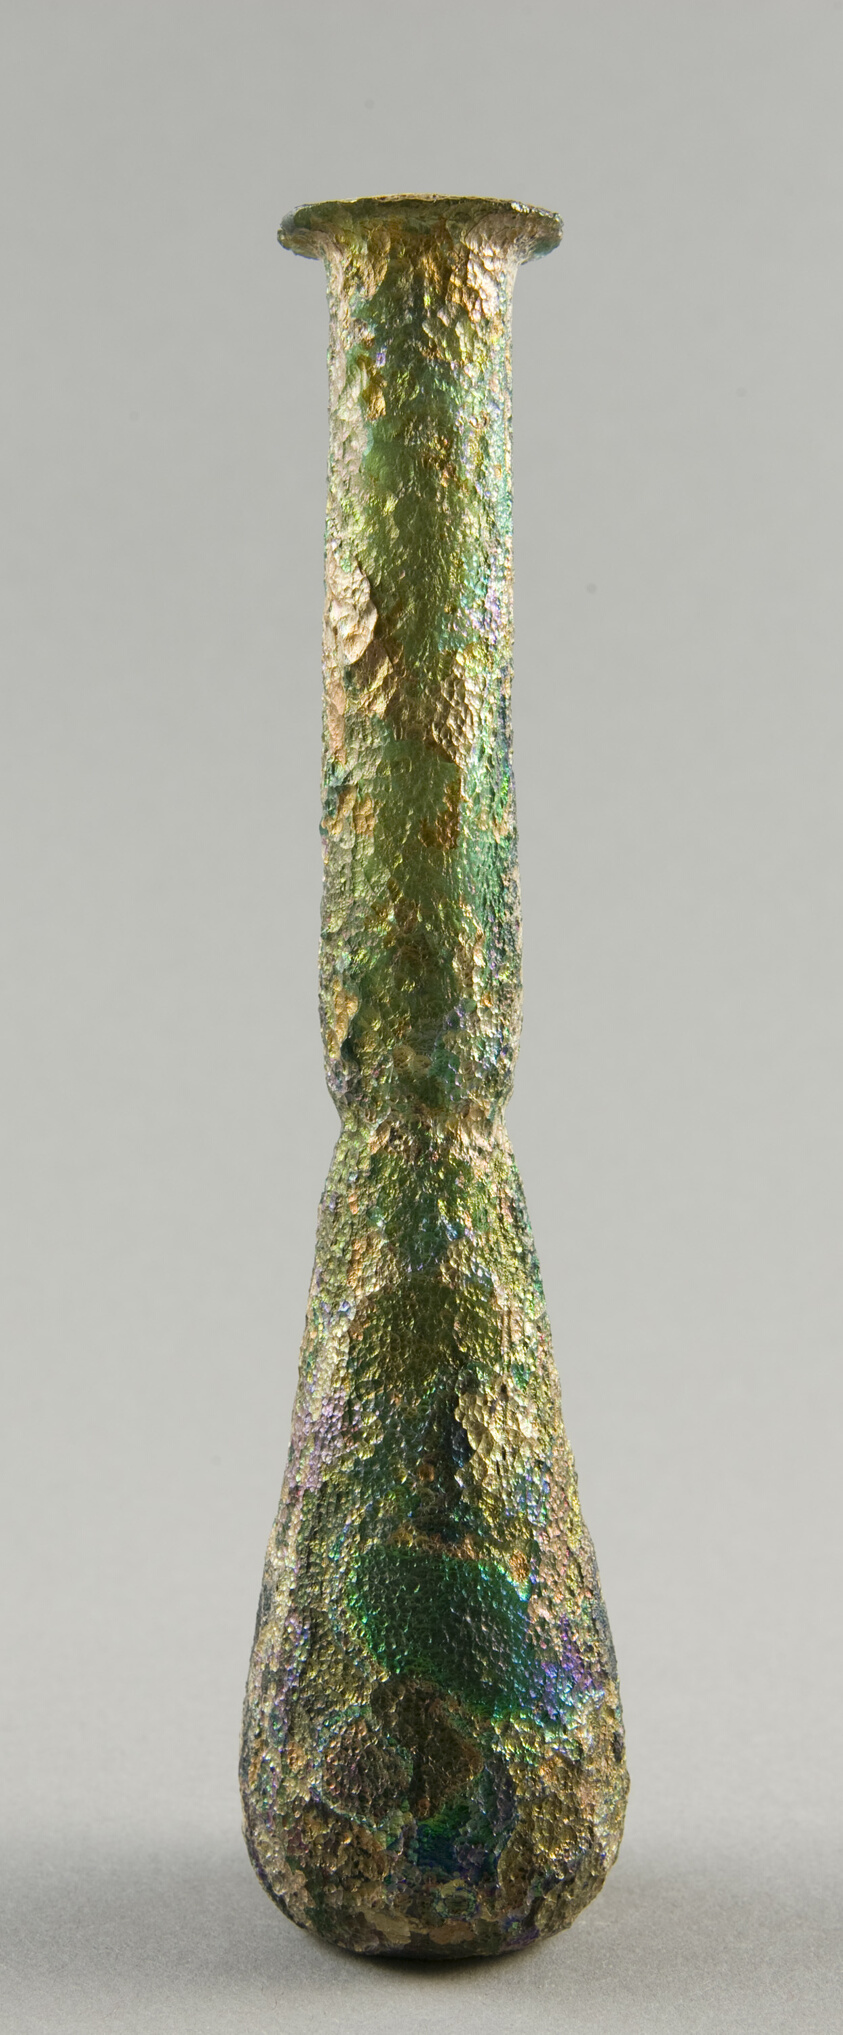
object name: Vessel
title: Bottle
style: syrian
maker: Roman, Levant or Syria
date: 2nd-4th century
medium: Glass, blown technique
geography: Syria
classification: bottle; glass; vessel; ancient art